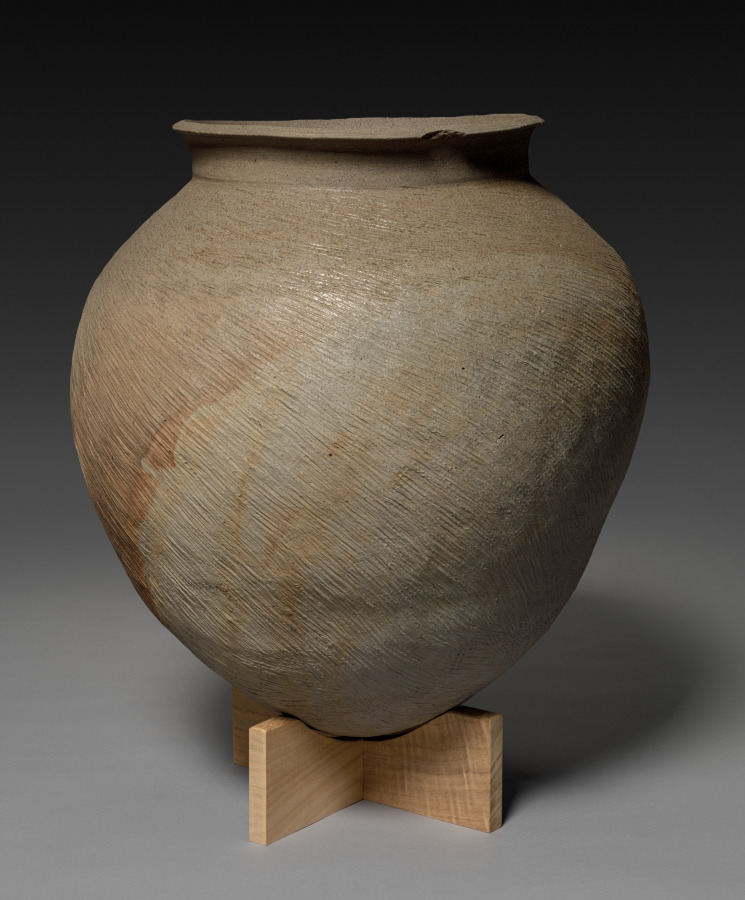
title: Wide-Mouth Jar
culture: Japan, Kamakura period (1185–1333) to Muromachi period (1392–1573)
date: 1300s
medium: Stoneware with impressed and incised decoration (Suzu ware)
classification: Ceramic